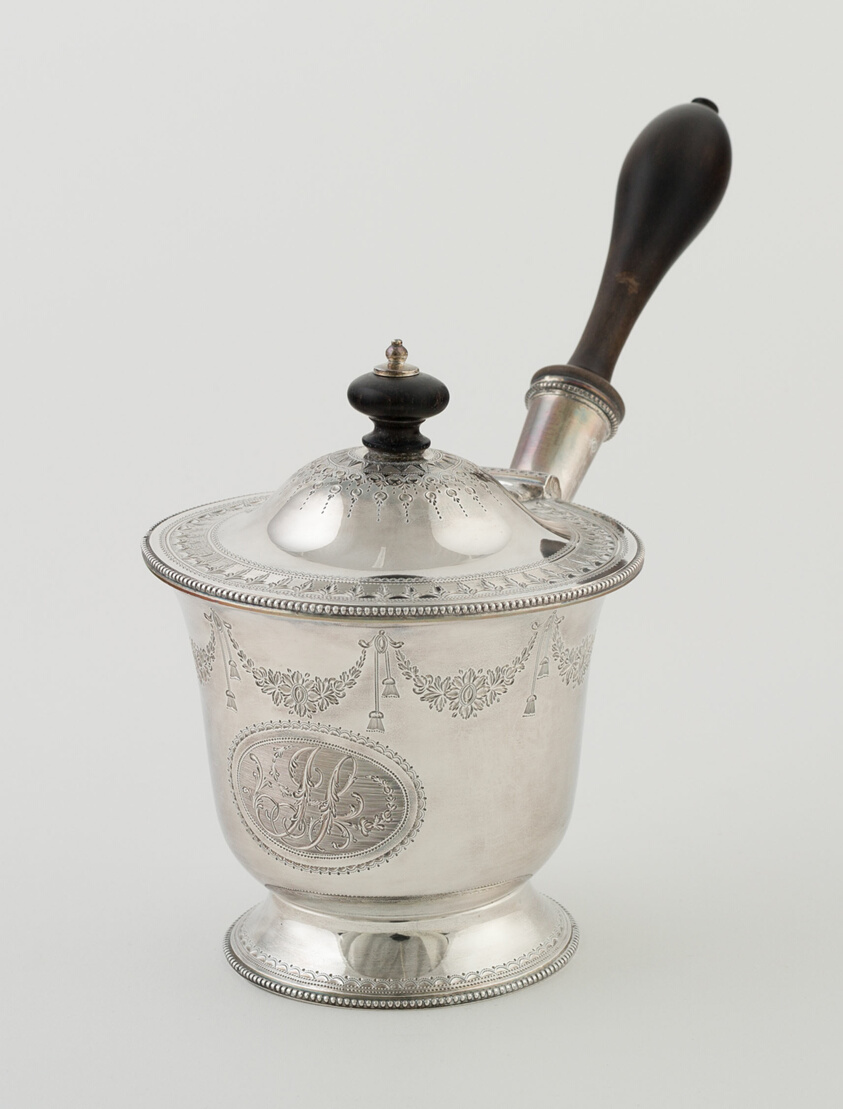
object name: Metalwork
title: Brandy Saucepan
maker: Hester Bateman; English, 1709-1794; London, England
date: 1787/88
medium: Silver and wood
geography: England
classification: silver; metalwork; european decorative arts